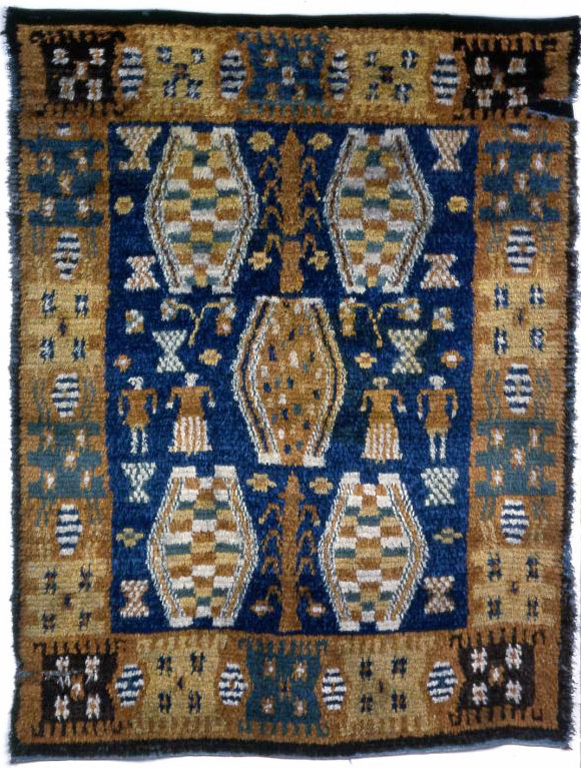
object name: Textile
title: Carpet (Known as a "Ryijy" or "Rya")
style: Folk Art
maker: Central Finland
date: 1701/25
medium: Wool, weft-faced warp-rib plain weave with supplementary wrapping wefts forming cut pile through a technique known as "Ghiordes knots"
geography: Finland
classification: textile; weaving - carpet; weaving